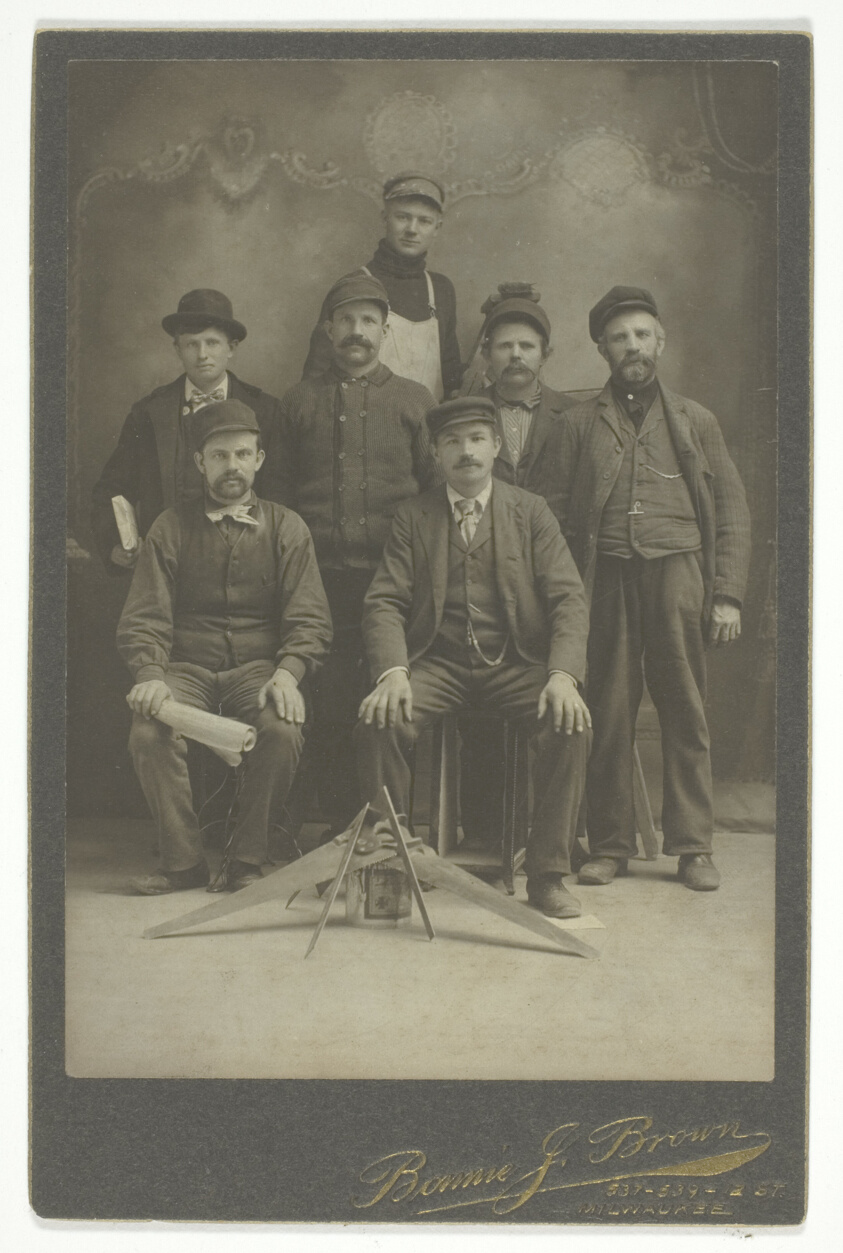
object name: Photograph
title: Untitled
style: 19th century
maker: Bonnie J. Brown (American, 19th century)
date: 1866/99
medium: Matte collodion print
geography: United States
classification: collodion printing-out-paper print (pop); cabinet card (collodion); photographic process; photography; photograph